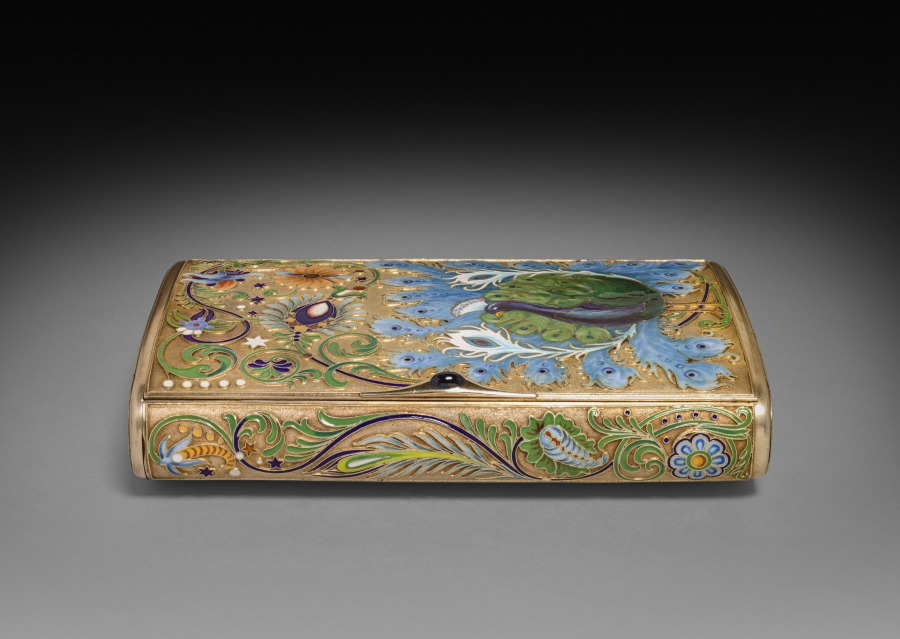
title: Cigar Box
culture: Russia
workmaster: attributed to Feodor Ivanovich Rückert (Russian, 1840–1917)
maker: House of Fabergé (Russian, 1842–1918)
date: c. 1896–1908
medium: Silver gilt, enamel, sapphire set in gold; [reproduction silk tinder cord, gold and moonstone catch]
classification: Silver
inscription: C. Fabergé (in Cyrillic); double-headed eagle [imperial warrant]; 84, Kokoshnik, tester's initials [assay mark for Moscow, 1896-1908]; scratched 16358.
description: Fabergé’s craftsmen in Moscow became known for their work in the pan-Slavic or neo-Russian taste, hearkening back to 17th-century styles of Russian folk decoration. In this whimsically oversized box for cigars or loose tobacco, Fabergé used the technique to highlight a symbol of imperial royalty, the preening peacock, here rendered in brilliant hues of blue and green enamels.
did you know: Peacocks were considered a symbol of imperial royalty in Russia.